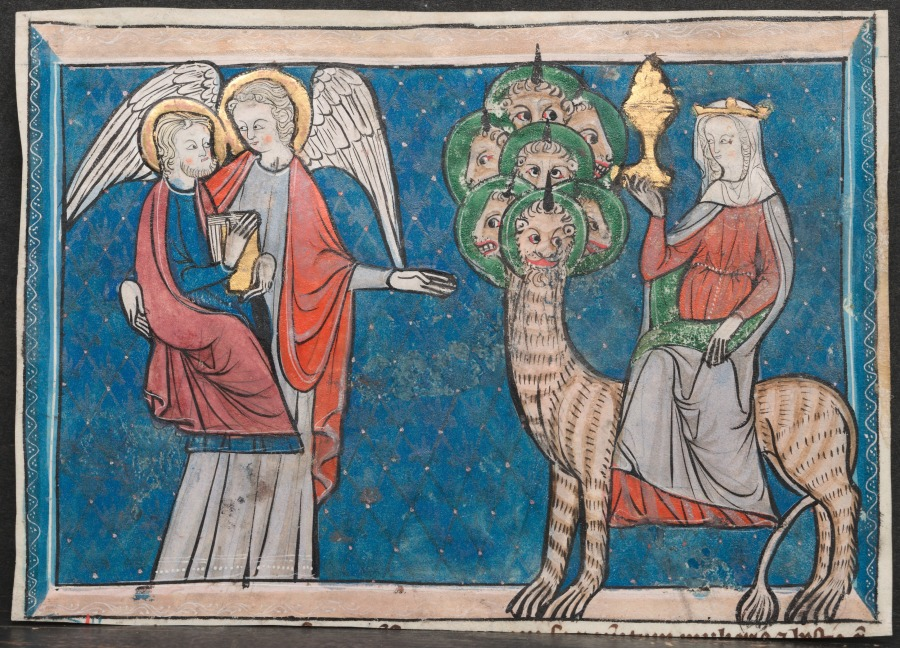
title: Miniatures from a Manuscript of the Apocalypse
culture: France, Lorraine, 13th century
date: c. 1295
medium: ink, tempera, and gold on vellum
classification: Manuscript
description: The visionary text of Saint John the Evangelist's Apocalypse, the final book of the New Testament, inspired these images of salvation, sin, and divine retribution. A large number of illustrated volumes of the Apocalypse appeared in Northern Europe, especially in England, after the year 1240-perhaps reflecting a fear of the world's end. These miniatures come from a manuscript produced in Lorraine, then artistically influenced by English models.